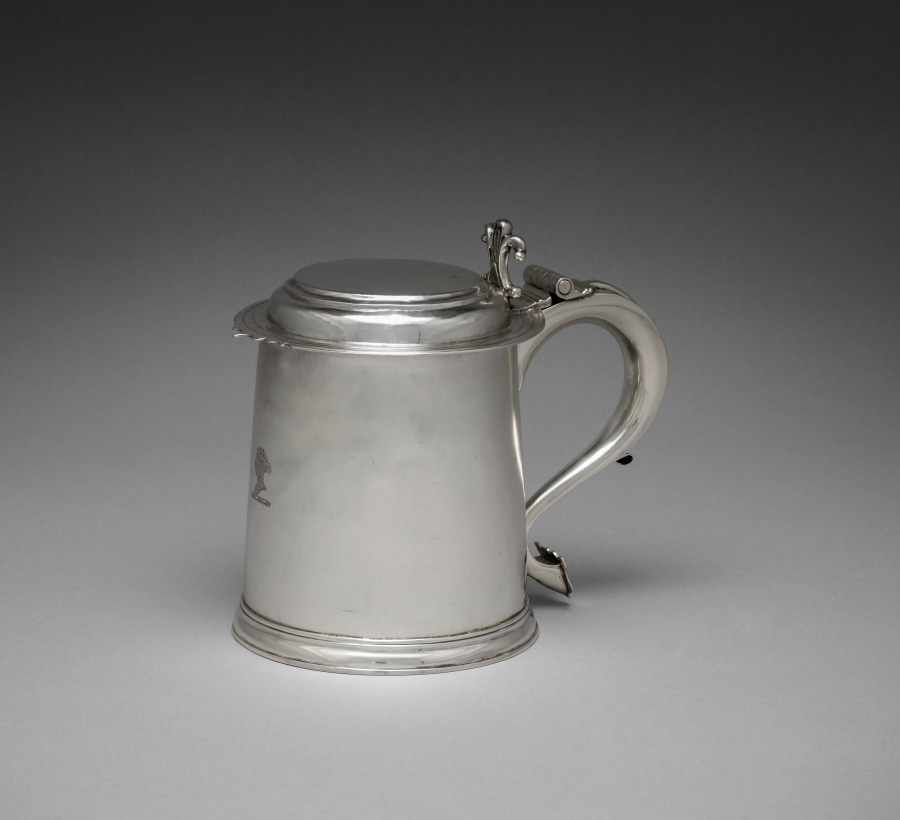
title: Tankard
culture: England, London, 18th century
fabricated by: Anthony Nelme (British)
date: 1703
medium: silver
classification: Silver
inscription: engraved beneath base: "H/RM." Engraved opposite handle crest with head of a blackamore; identified in Fairbairn as DEN family crest.